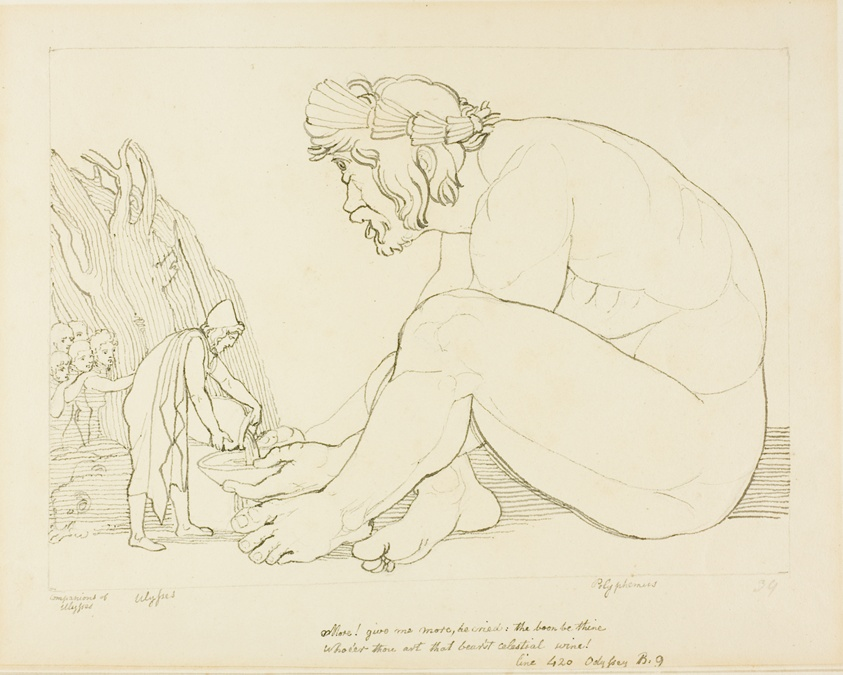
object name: Drawing and Watercolor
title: Polyphemus Begging Ulysses for More Wine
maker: John Flaxman, II; English, 1755-1826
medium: Pen and black ink, over graphite, on cream wove paper, laid down on ivory wove paper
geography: England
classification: pen and ink drawings; drawings (visual works); prints and drawing